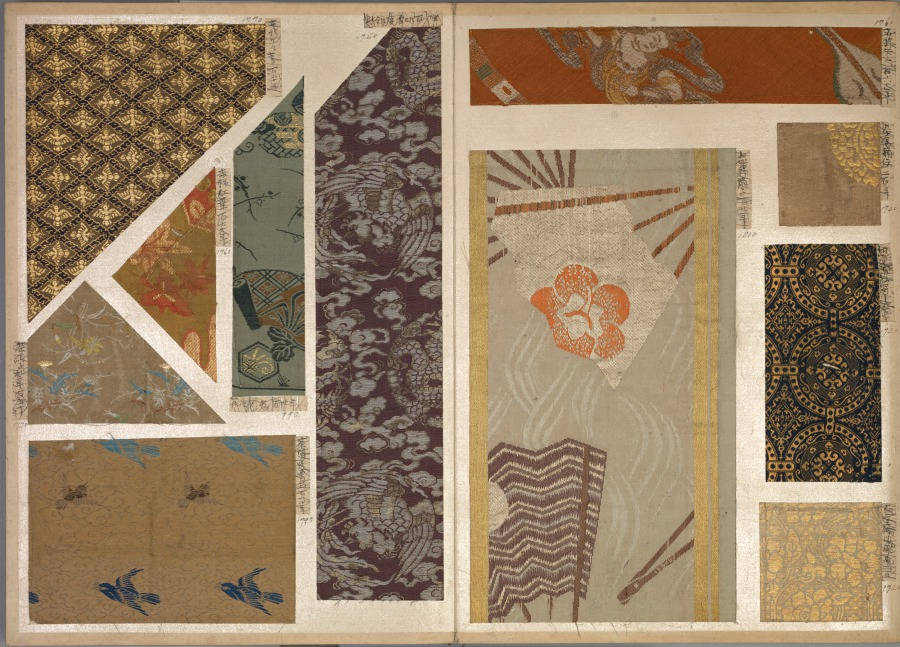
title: Album of Textile Samples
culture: Japan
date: 1790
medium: silk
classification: Textile